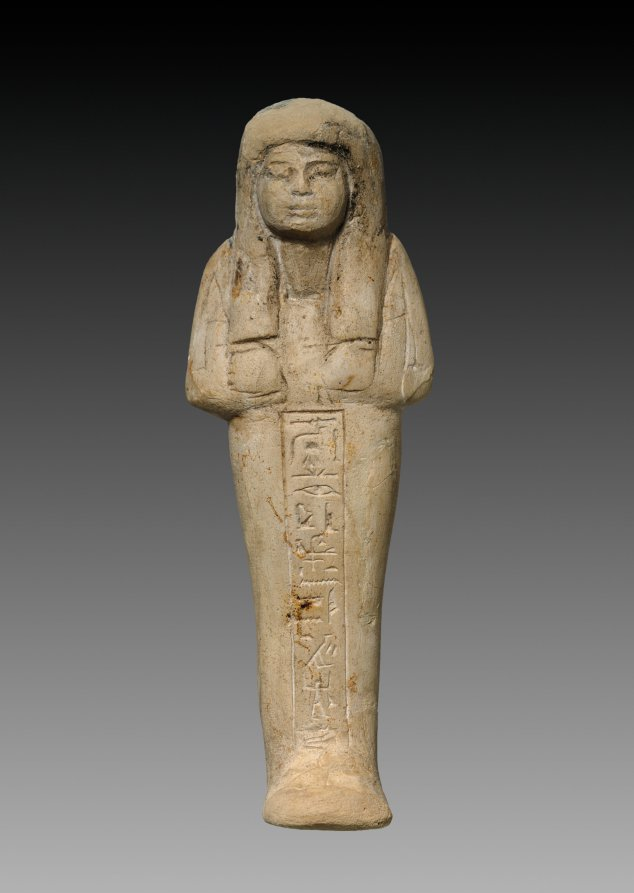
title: Shawabty of Takai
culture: Egypt, New Kingdom (1540–1069 BCE), Dynasties 18–19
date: c. 1350–1250 BCE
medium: limestone, originally painted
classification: Funerary Equipment